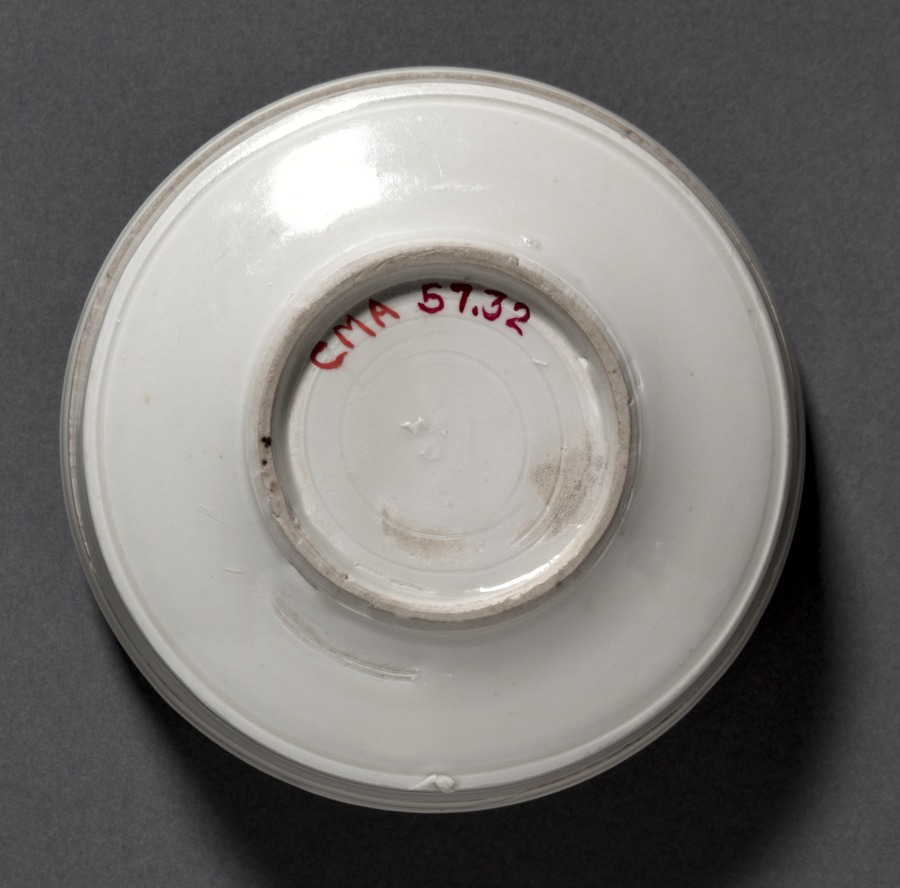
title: Covered Box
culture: China, Hebei province, Quyang, Northern Song dynasty (960-1127) to Jin dynasty (1115-1234)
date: 1100s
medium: cream-glazed porcelain with incised decoration, Ding ware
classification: Ceramic